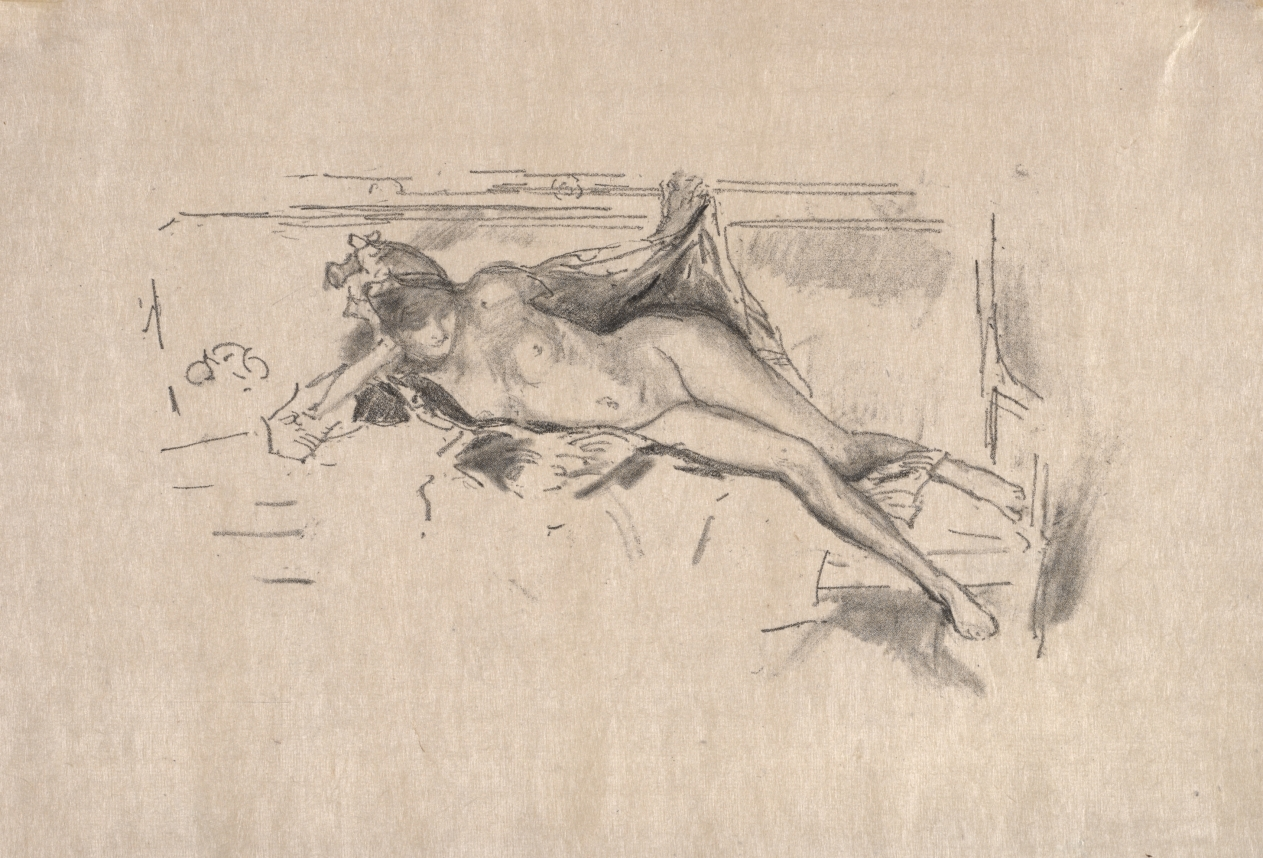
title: Nude Model Reclining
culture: America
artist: James McNeill Whistler (American, 1834–1903)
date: 1893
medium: lithograph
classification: Print